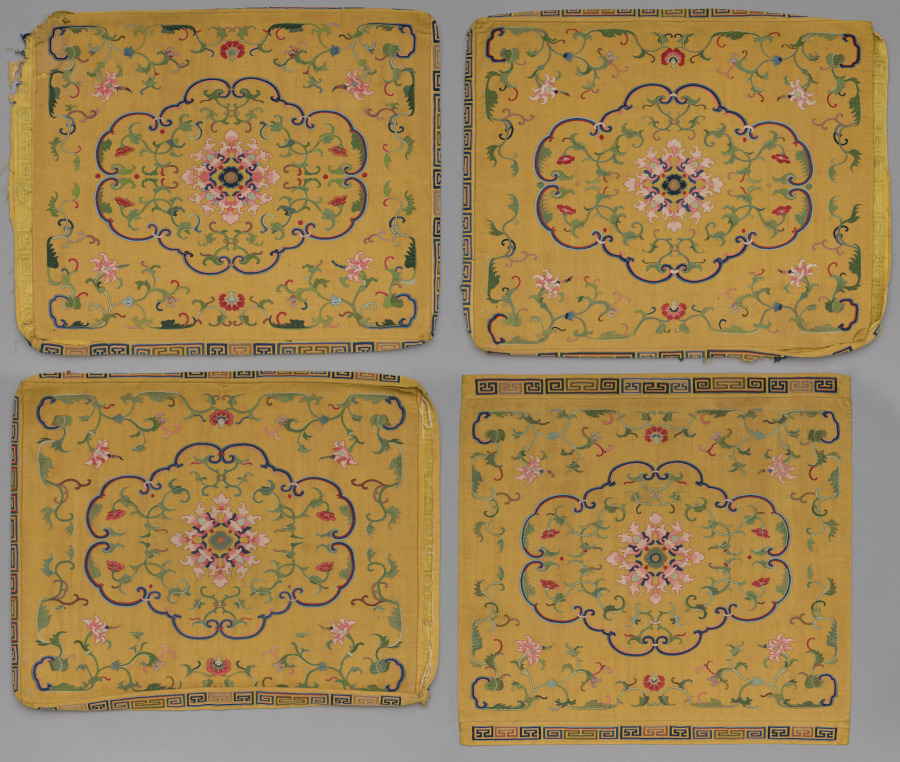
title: Set of Four Cushion Covers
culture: China, Qing dynasty (1644-1911)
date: 1700s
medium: silk, metallic thread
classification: Textile